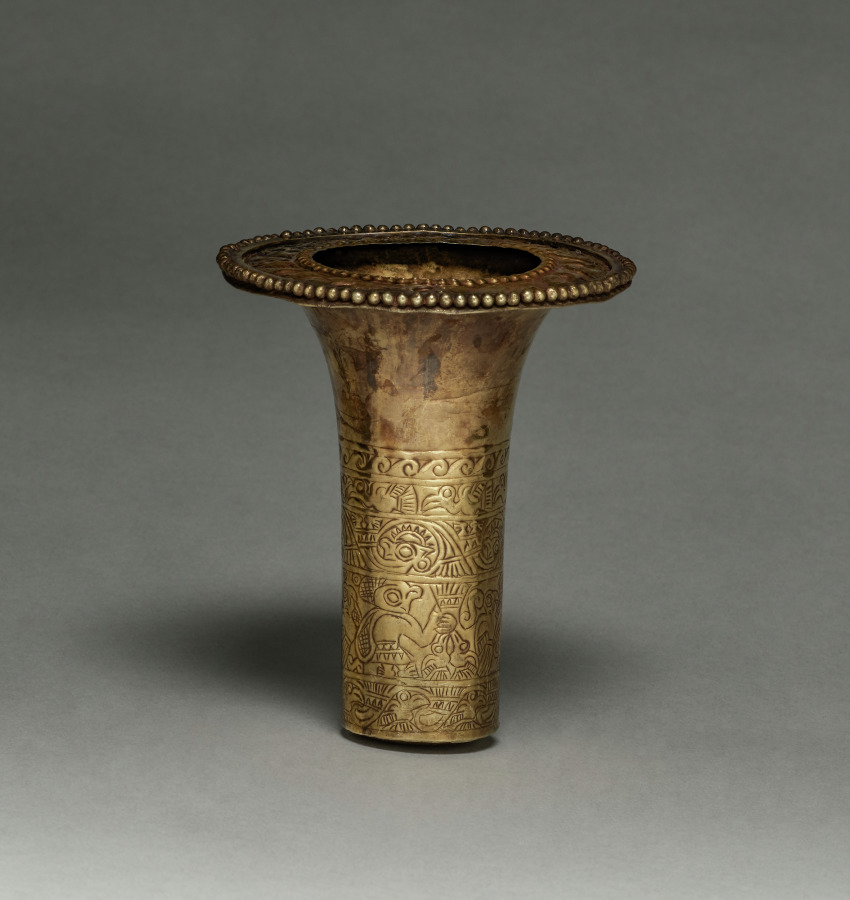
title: Ear Flare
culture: Peru, North Coast, Chimú style (900-1470)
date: 900–1470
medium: hammered gold alloy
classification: Metalwork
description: North Coast ear ornaments typically have a long shaft that balanced the weight of the glorious frontal. This pair illustrates Chimú interest in the sea, which had great economic and religious importance. On the shafts are bands of seabirds and waves, and a similar pattern edges the frontals, which were altered in modern times. Originally solid disks, the frontals' centers were cut out and a dotted band was added to the rim.